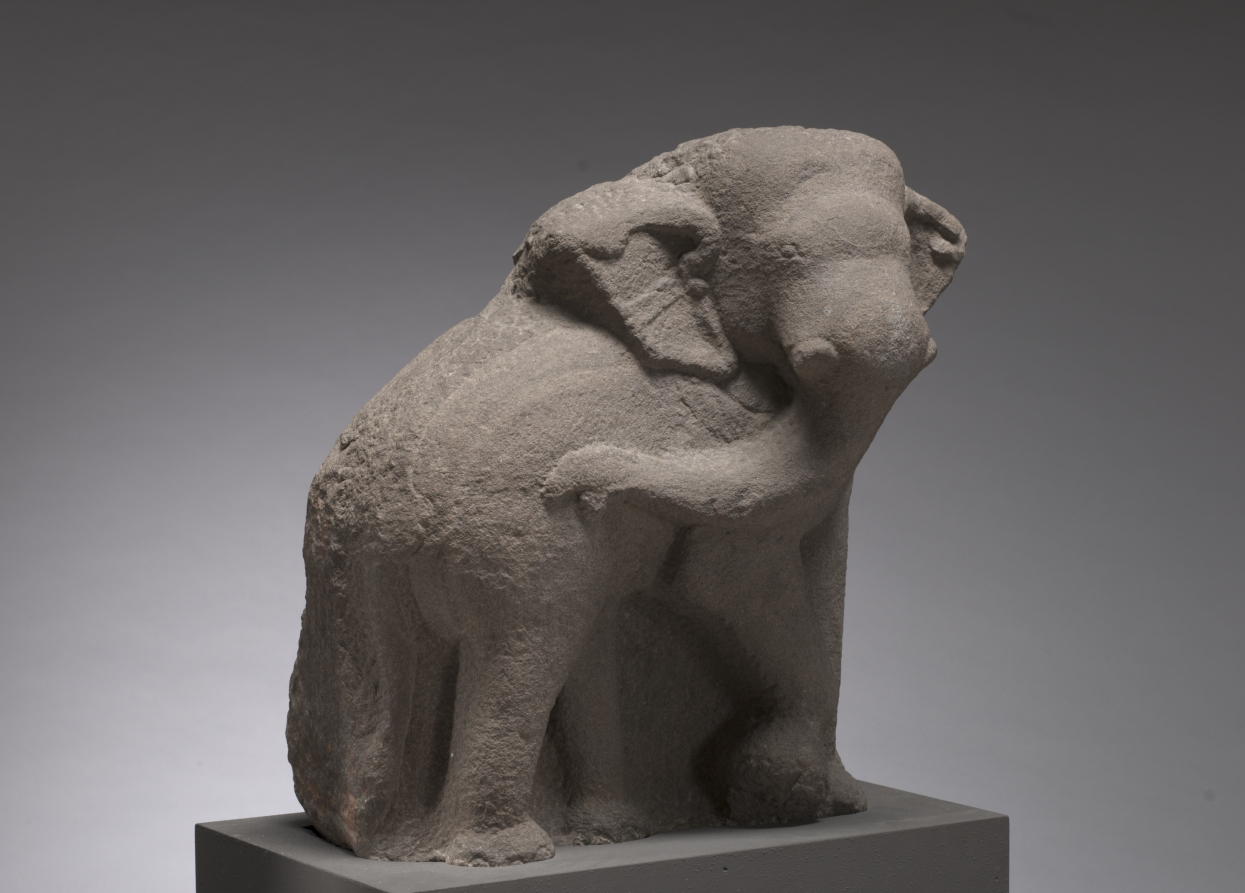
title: Elephant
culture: Vietnam, Tra-Kieu, 1st half of 10th Century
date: 900–950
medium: sandstone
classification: Sculpture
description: The Cham kingdom was located in present-day central Vietnam and was a powerful rival of the Khmer in Cambodia. During the time when this charming, naturalistic elephant sculpture was made, the Cham were actively absorbing stylistic elements from India.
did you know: The elephant's features are worn and softened due to weathering.